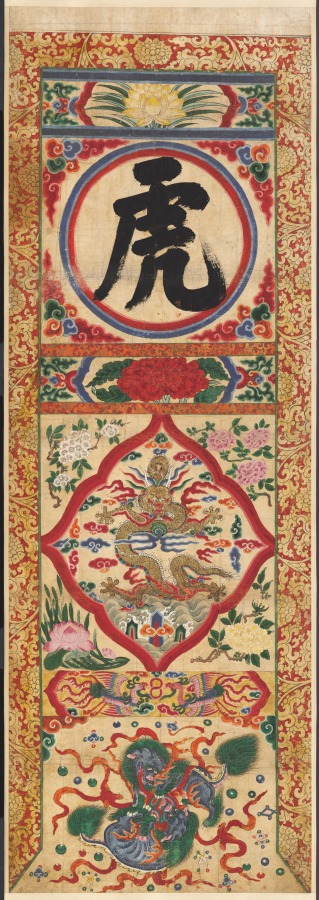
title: Set of Four Painted Characters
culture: Korea, Joseon dynasty (1392–1910)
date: early 1900s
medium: hanging scroll, ink and color on paper; unmounted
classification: Painting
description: This set of four colorful hanging scrolls may have been used in an outdoor Buddhist ritual to evoke heavenly blessings. Each hanging scroll bears four different characters: tiger, dragon, whistle, and recite. Traditionally, tiger and dragon belong to the four directional guards, respectively west and east.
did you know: This set of four colorful hanging scrolls may have been used in an outdoor Buddhist ritual to evoke heavenly blessings.